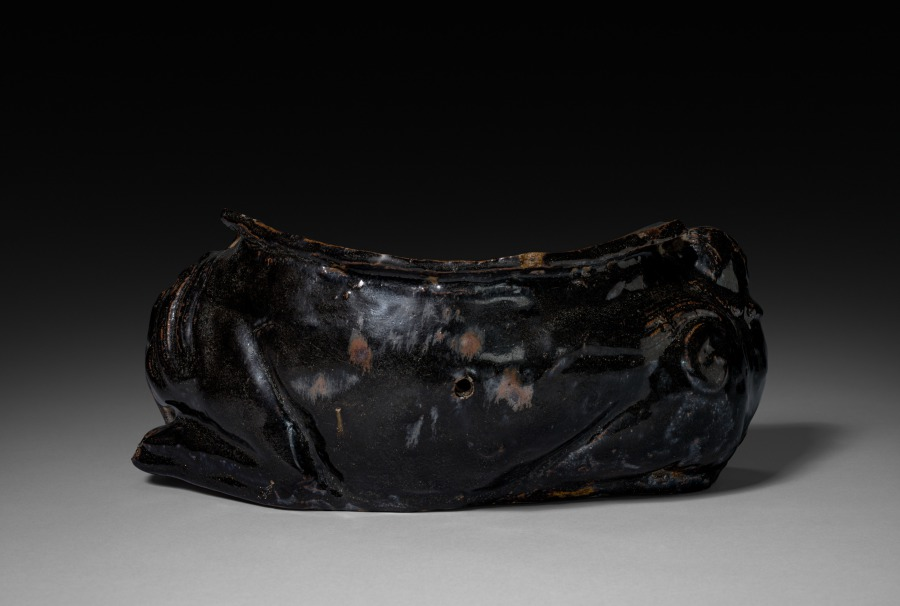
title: Pillow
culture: China, Yuan dynasty (1271-1368)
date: 1100s-1200s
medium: Glazed stoneware, Cizhou ware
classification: Ceramic